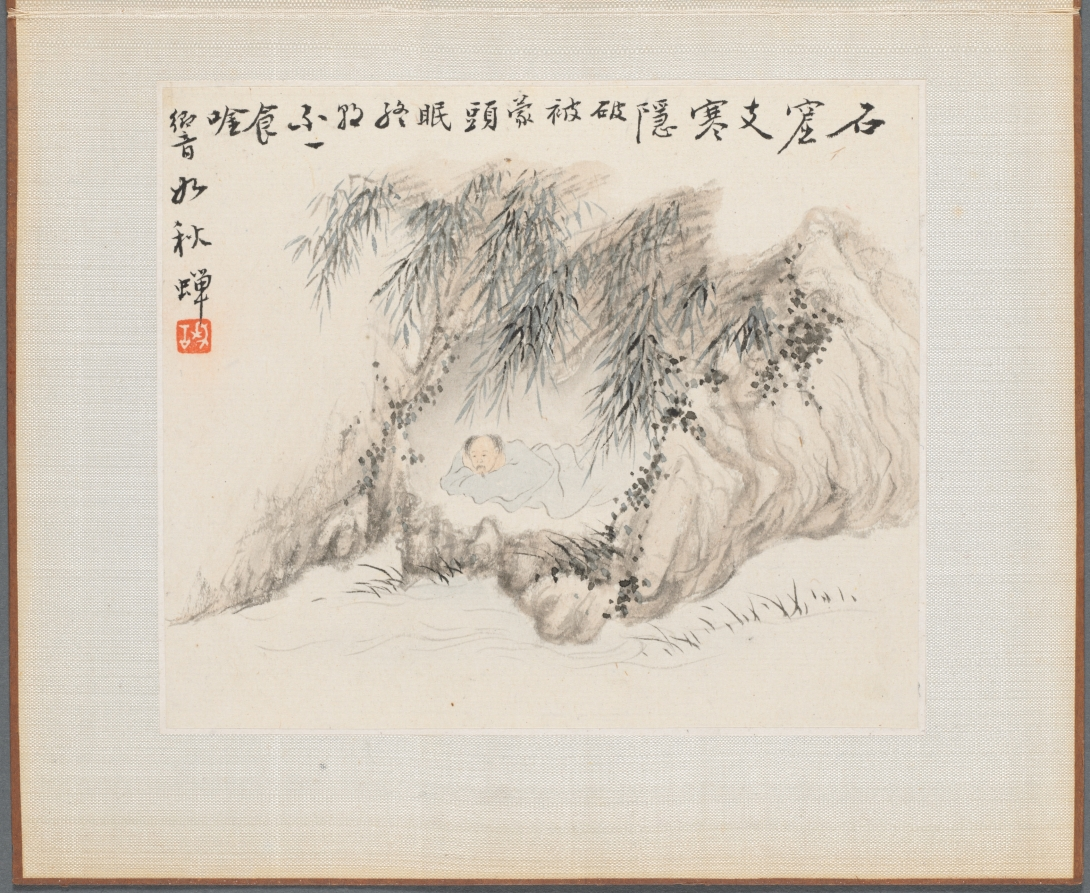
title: Album of Landscape Paintings Illustrating Old Poems: Man Resting under Bamboo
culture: China, Qing dynasty (1644-1911)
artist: Hua Yan (Chinese, 1682–c. 1765)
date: 1745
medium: album leaf, ink and light color on paper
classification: Painting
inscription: Calligraphy above and to left of image; seal below calligraphy on left